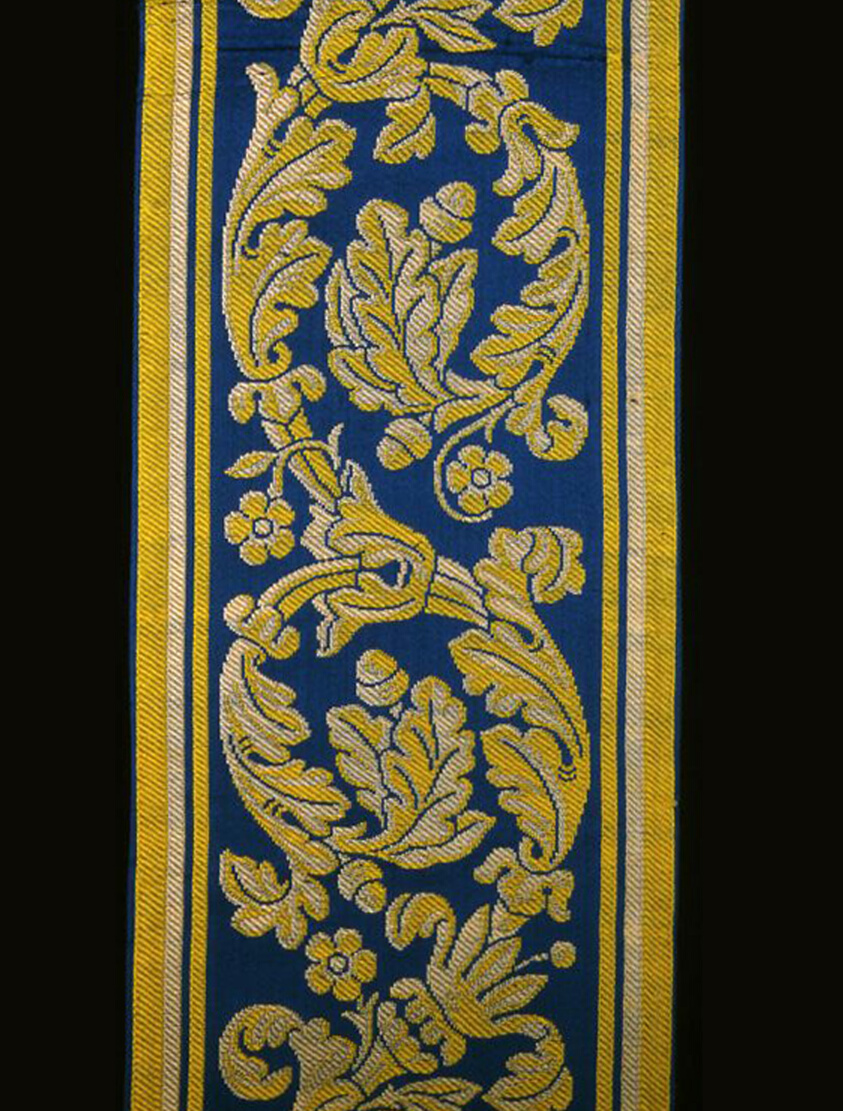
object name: Textile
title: Border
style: empire, european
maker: France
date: Empire period, 1804/14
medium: Silk, warp-float faced 4:1 satin weave with weft-float faced 3:1 twill interlacings of secondary binding warps and supplementary patterning wefts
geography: France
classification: textile; weaving